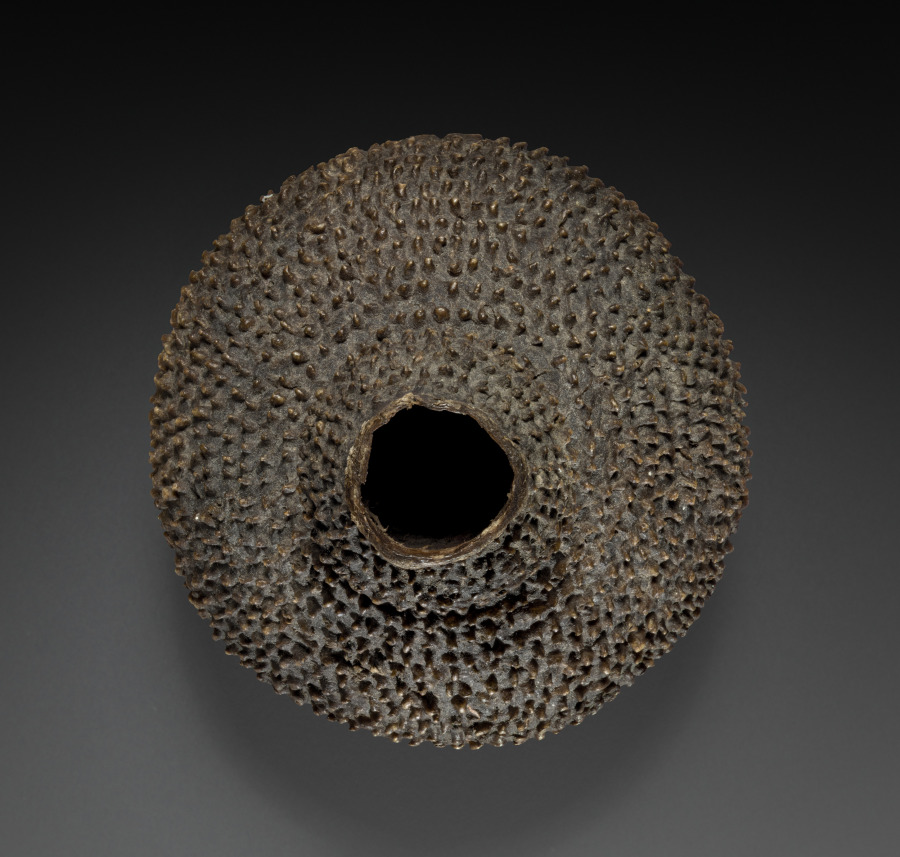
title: Snuff Container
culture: Africa, Southern Africa, South Africa, Xhosa-style maker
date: late 1800s or early 1900s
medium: Hide, earth, and blood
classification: Vessels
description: Snuff containers made from a mixture of hide, earth, and blood constitute a very rare type of object in the artistic production of southern Africa. The specific gourdlike shape is an even more unusual occurrence. Its materials and purpose refer to the communication between animals and humans.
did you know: The tobacco product snuff was stored in decorative, yet useful, containers like this one.